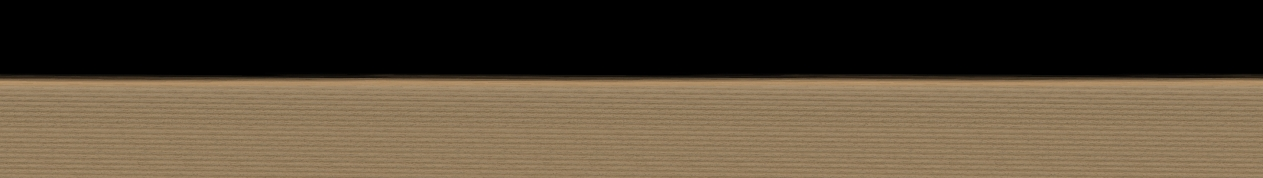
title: "Seventh Month" from the Odes of Bin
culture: China, Southern Song dynasty (1127-1279)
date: 1200s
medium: Handscroll; ink and color on silk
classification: Painting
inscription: Colophons: 1. [on the frontispiece] by the Qianlong emperor (dated 1741). 2. by Lu Wan (dated Zhengde dingchou, 1517). 2. by the Jiaqing emperor (dated 1807).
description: According to Confucian thought, the ruler looks after the well-being of his people which involves agricultural activities. Seventh Month from the ancient Odes of Bin in the Shijing (Book of Poetry) describes occupations throughout the year, including plowing, harvesting, hunting, making clothes, and observing rituals. The earliest illustrations of these Odes accompanied by text were commissioned by Southern Song emperor Gaozong (reigned 1127–1162). As the lower Yangzi delta had become the new seat of government, Gaozong had sets of these illustrations produced by court artists to revive the dynasty and convince the Confucian officialelite of his legitimacy to rule.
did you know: The Odes of Bin appears in the classic Shijing (Book of Poetry), an anthology of more than 300 poems, folk songs, and ceremonial hymns that were originally chanted to music.